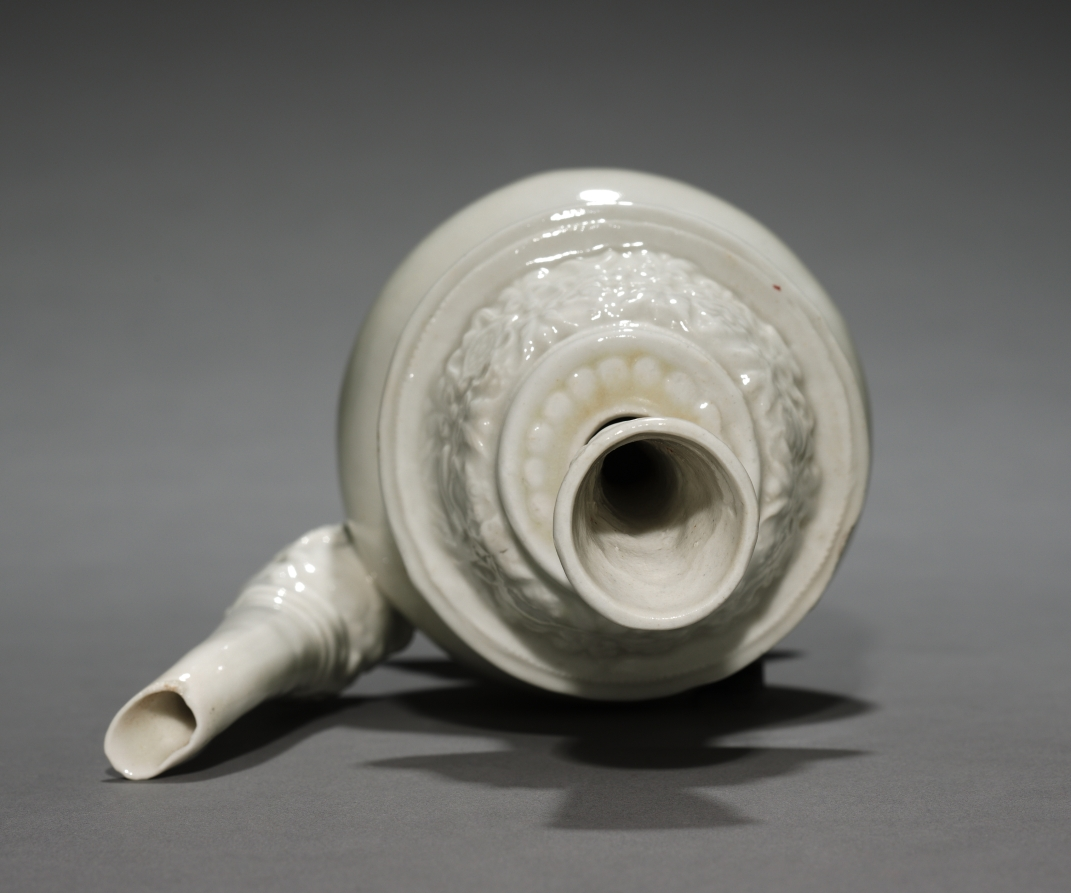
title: Ewer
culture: China, Yuan dynasty (1271-1368) - Ming dynasty (1368-1644)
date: 1300s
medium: porcelain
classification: Ceramic